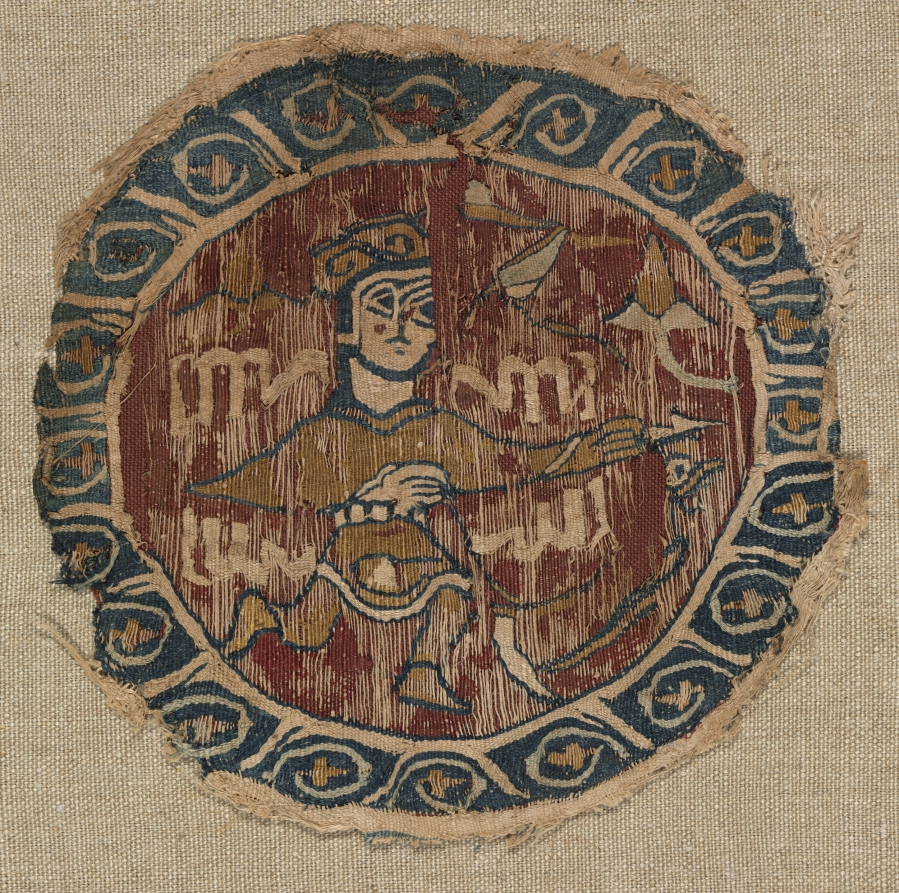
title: Roundel with figure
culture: Egypt, Fatimid period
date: 1000s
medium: Linen and silk: plain weave with inwoven tapestry weave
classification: Textile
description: A running figure clad in a short tunic, turban, and low boots is portrayed in this roundel. The figure holds in his right hand a string attached to a falcon which stands in the space beneath his outstretched left hand. In the upper background are foliate forms on long curving stems. The roundel is framed with a border decorated with a pseudo-inscription in deformed Kufic letters against a floriate background.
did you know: The Arabic word for God, written in Naskhi, appears below the figure's left arm and repeats upside down in the other spaces around him.